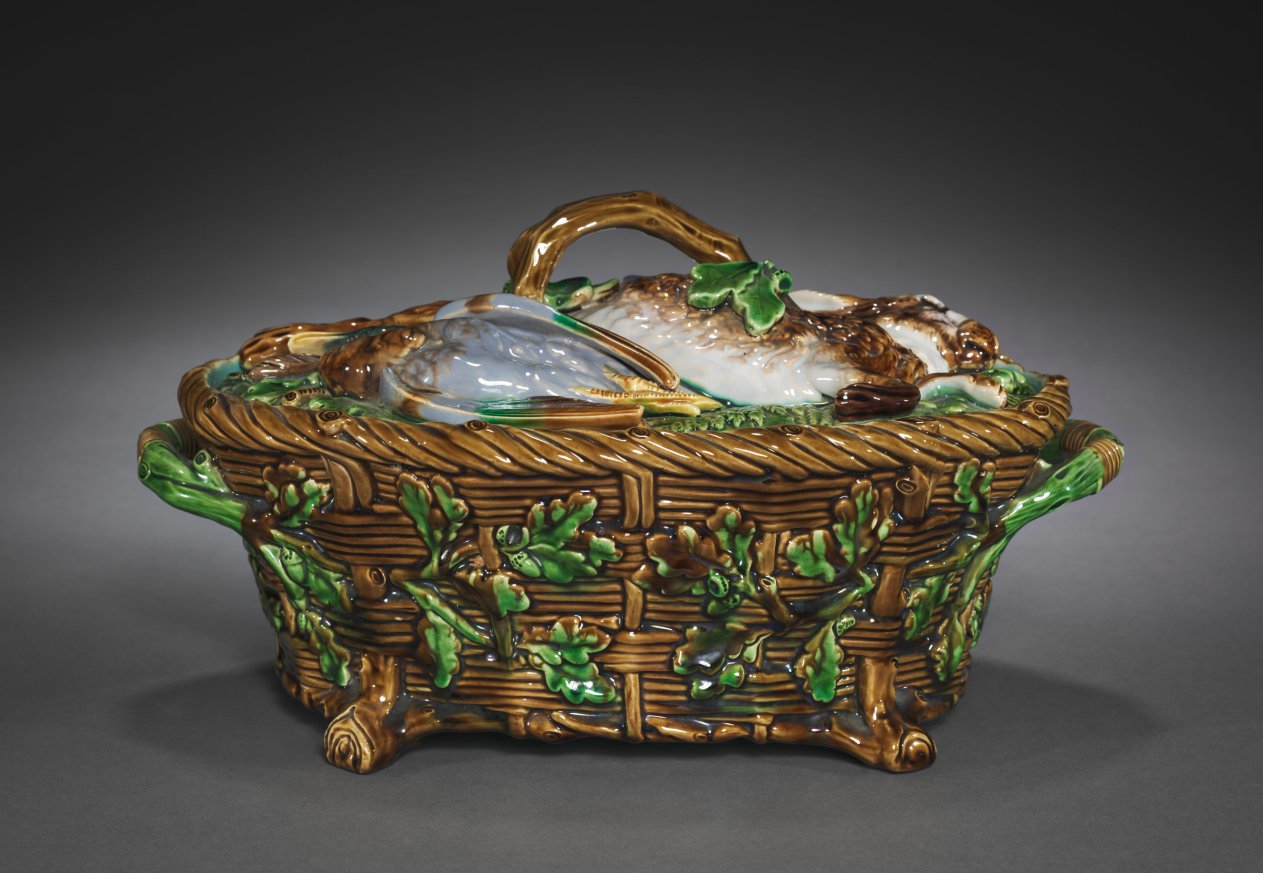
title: Game Pie Dish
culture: England, 19th century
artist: Minton Pottery and Porcelain Factory (British)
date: c. 1860–80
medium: earthenware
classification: Ceramic